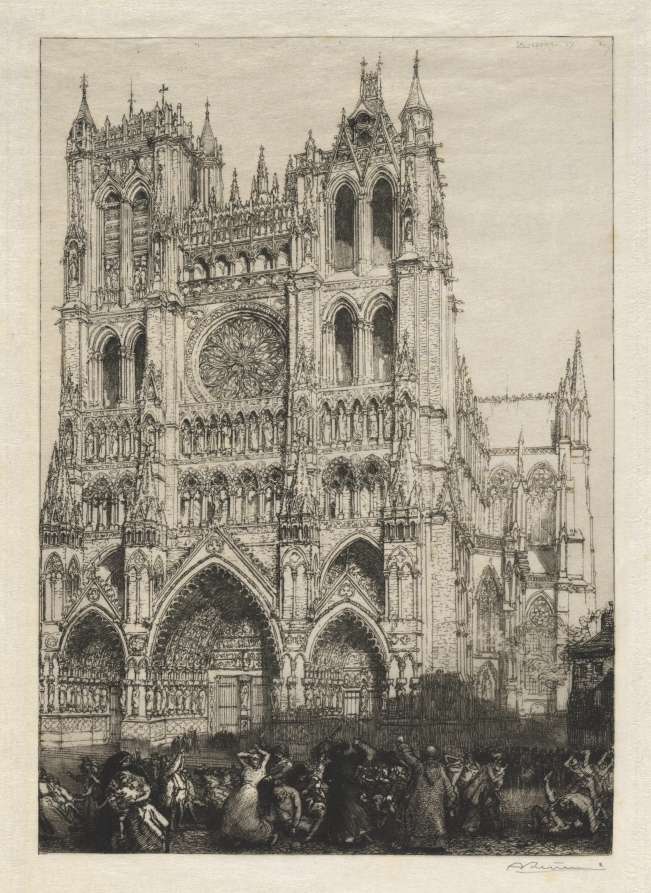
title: Amiens Cathedral, Inventory Day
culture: France, 19th century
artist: Auguste Louis Lepère (French, 1849–1918)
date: 1887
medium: etching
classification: Print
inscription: signed in pencil, lower right margin: A Lepere signed and dated upper right in plate: A Lepere-87